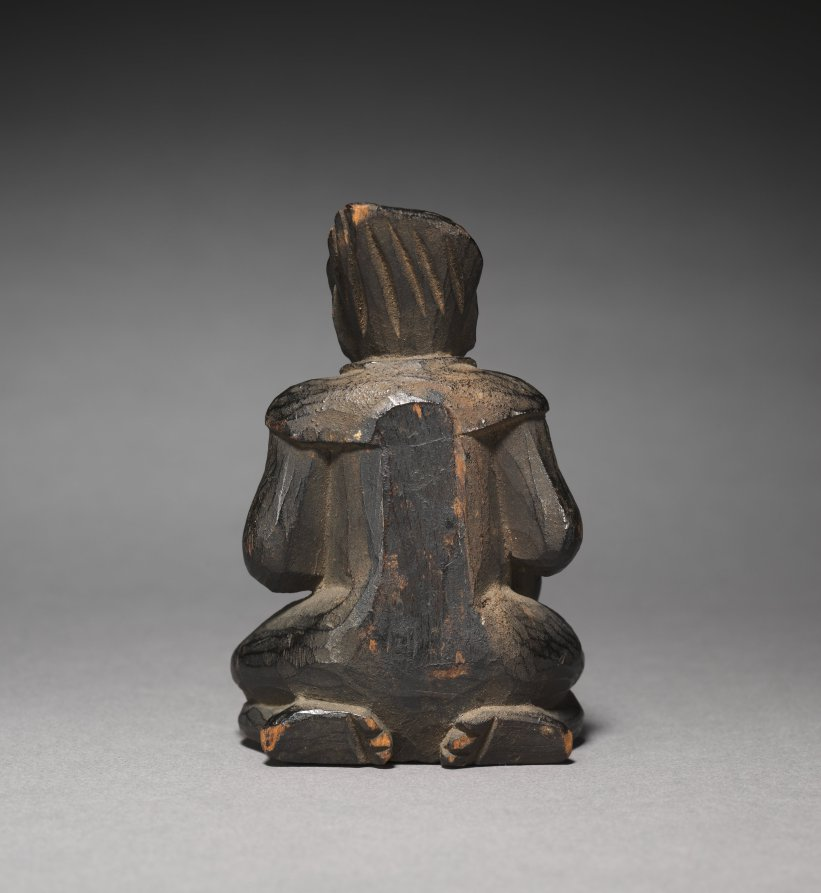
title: En no Gyōja with Zenki and Kōki (Kōki)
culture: Japan, Edo period (1615–1868)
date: 1615–1868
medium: wood and paint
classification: Sculpture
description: This is one of a trio of figures identified as Enno Gyoja and his two attendants, Zenki and Koki. The set follows the iconography of Shugendo, the traditional mountain ascetic practice in Japan. Enno Gyoja is depicted as a hermit-monk, seated on a rock attached to a modern base. He holds a staff in his right hand and a sutra in the left. The two attendants take the form of half-human, half-demonic figures and are regarded as a married couple.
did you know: Koki carries a sake bottle.